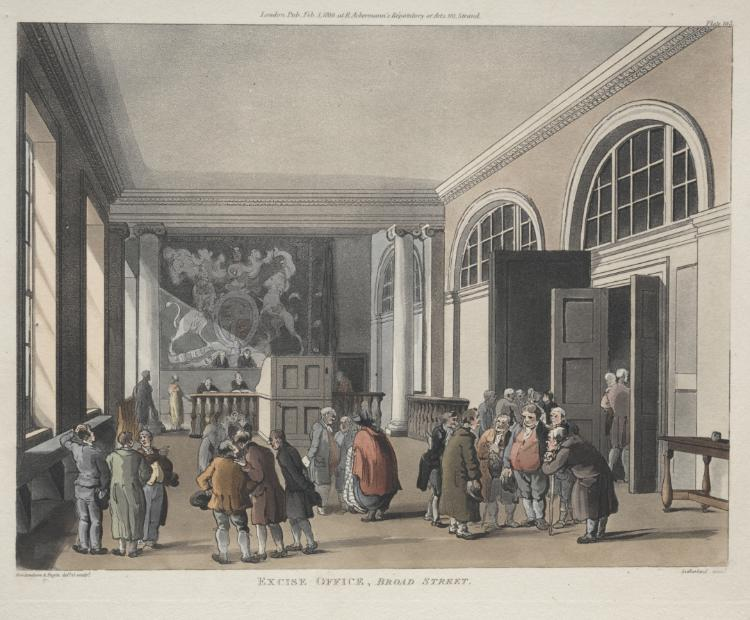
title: Excise Office, Broad Street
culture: England, late 18th-early 19th Century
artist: Thomas Rowlandson (British, 1756–1827)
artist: and Augustus Charles Pugin (British, 1762–1832)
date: 1810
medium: etching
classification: Print